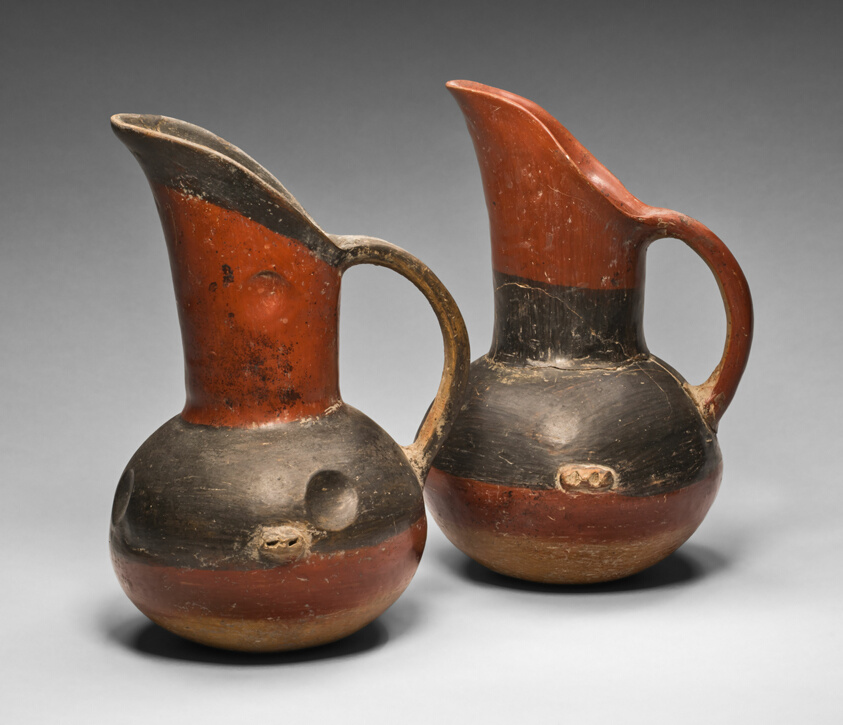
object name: Vessel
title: Polychrome Pitcher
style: cholula, americas, mesoamerican, Arts of the Americas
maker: Cholula (Cholula, Mexico)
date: 1400–1520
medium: Earthenware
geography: Cholula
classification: pitcher (vessel); earthenware; art of the americas; vessel; ceramics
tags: servingware